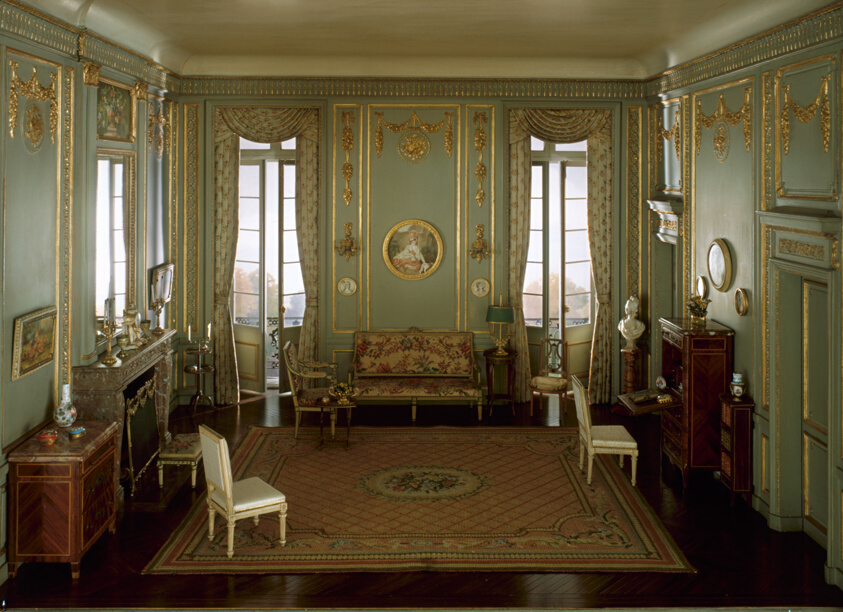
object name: Miniature room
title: E-24: French Salon of the Louis XVI Period, c. 1780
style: louis xvi, european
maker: Designed by Narcissa Niblack Thorne; American, 1882-1966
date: c. 1937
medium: Miniature room, mixed media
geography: United States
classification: miniature; thorne rooms